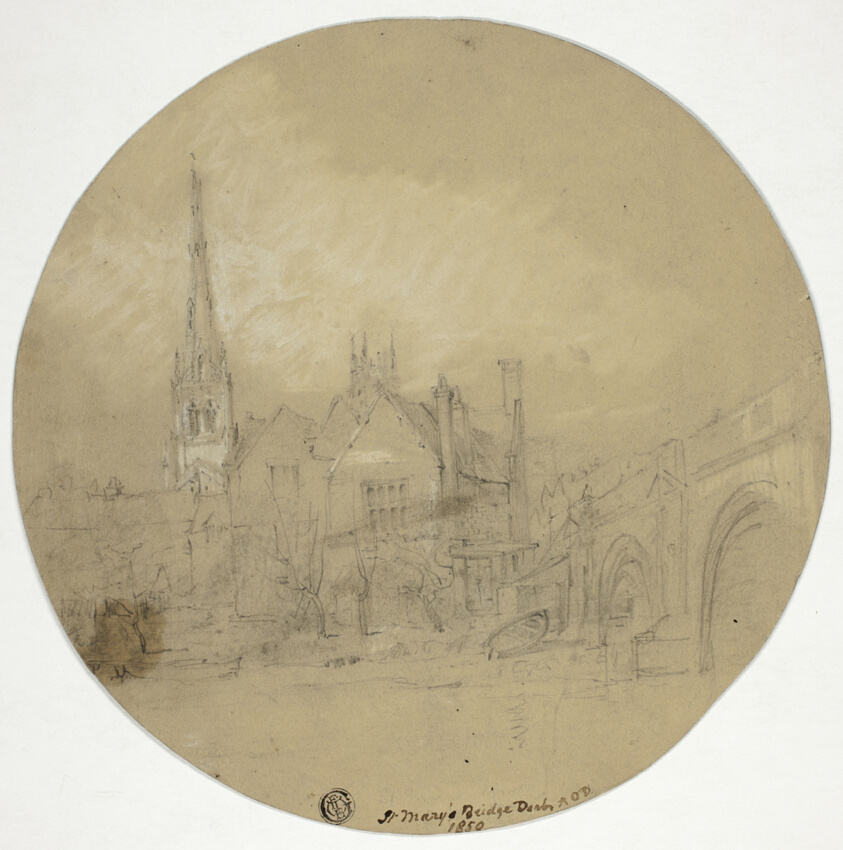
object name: Drawing and Watercolor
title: Saint Mary's Bridge, Derby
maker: Augustus Oakley Deacon (English, 1819-1899)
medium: Graphite, heightened with white gouache, on roundel-shaped tan wove paper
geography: England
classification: graphite; drawings (visual works); prints and drawing